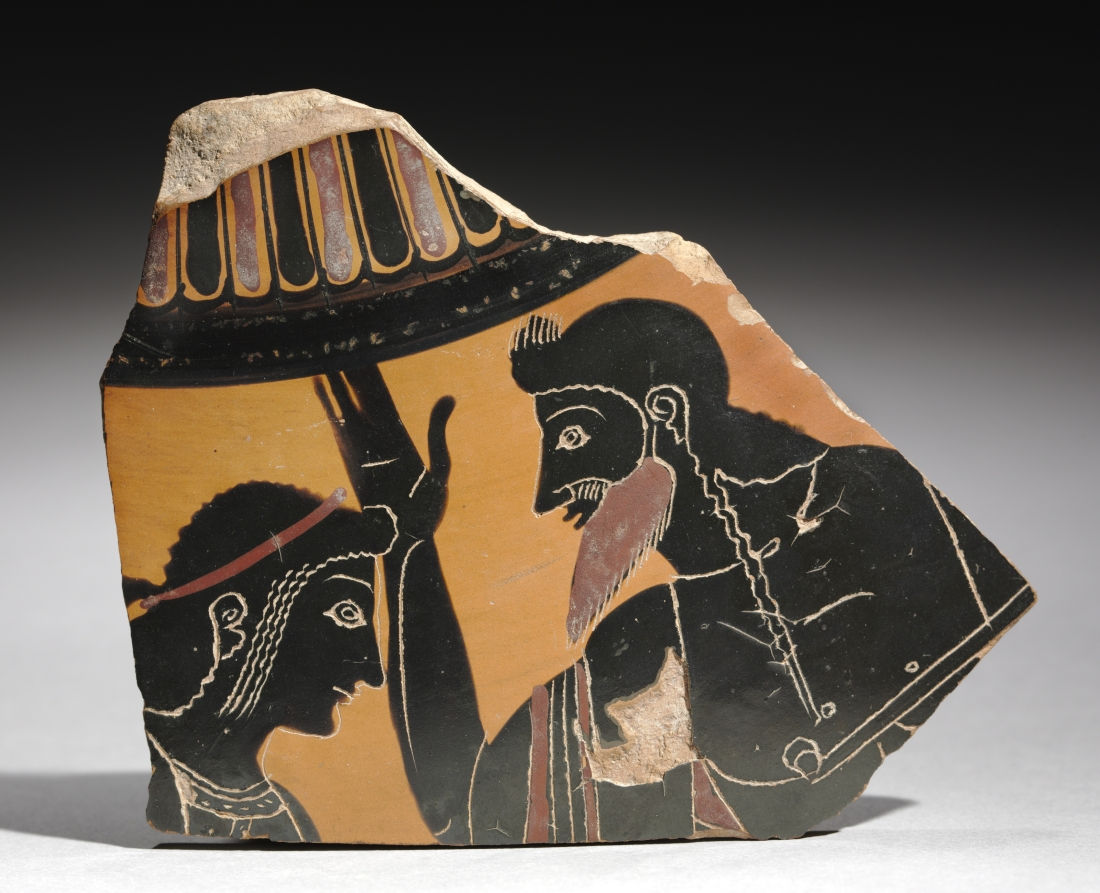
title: Fragment from Black-Figure Neck-Amphora of Panathenaic Shape (Storage Vessel): Apollo and Zeus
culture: Greek, Attic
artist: manner of Antimenes Painter (Greek, Attic, active c. 530–510 BCE)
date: c. 520 BCE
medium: ceramic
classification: Ceramic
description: Comparison with better-preserved vases—and with other artworks and monuments, such as the famous Siphnian Treasury at Delphi—helps to fill in some of the action no longer surviving from the rest of this vase, which once showed Apollo and Herakles struggling for the Delphic tripod. One claw-footed leg of the tripod survives, across the chest of Zeus, the bearded figure who intervened to stop the quarrel between two of his sons. Apollo is the unbearded figure at left, while Herakles would have appeared beyond the break on the right.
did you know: The claw-footed tripod leg before Zeus's chest identifies the scene—the struggle for the Delphic tripod.